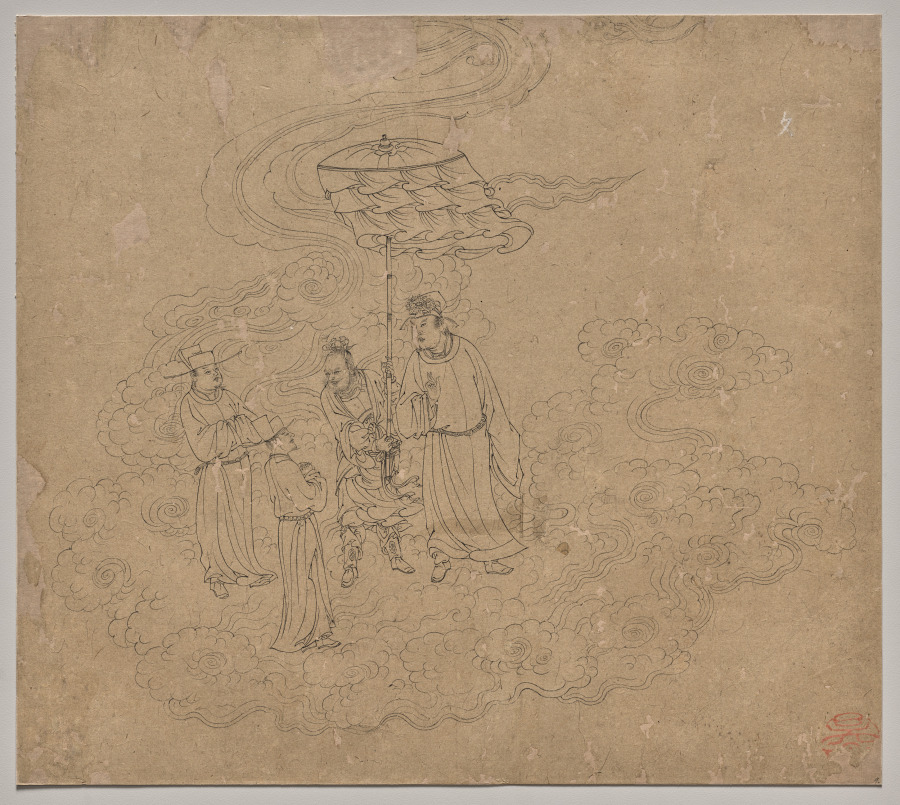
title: Album of Daoist and Buddhist Themes: Procession of Daoist Deities: Leaf 9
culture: China, Southern Song dynasty (1127-1279)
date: 1200s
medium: Album, ink on paper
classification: Painting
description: This extraordinary album has 50 paintings on a variety of religious subjects. They were likely created by several master craftsmen to share with studio apprentices as models for fulfilling commissions. The Jade Emperor and the Daoist pantheon make up the first 26 leaves. The next 14 leaves portray the Buddhist Ten Kings of Hell administering punishments to the dead. The third section, called “Clearing the Mountains,” features divine soldiers, led presumably by the deity Erlang Shen 二郎神, fighting undesirable creatures.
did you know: A divine lord, likely one of the Five Emperors, is escorted by three attendants.